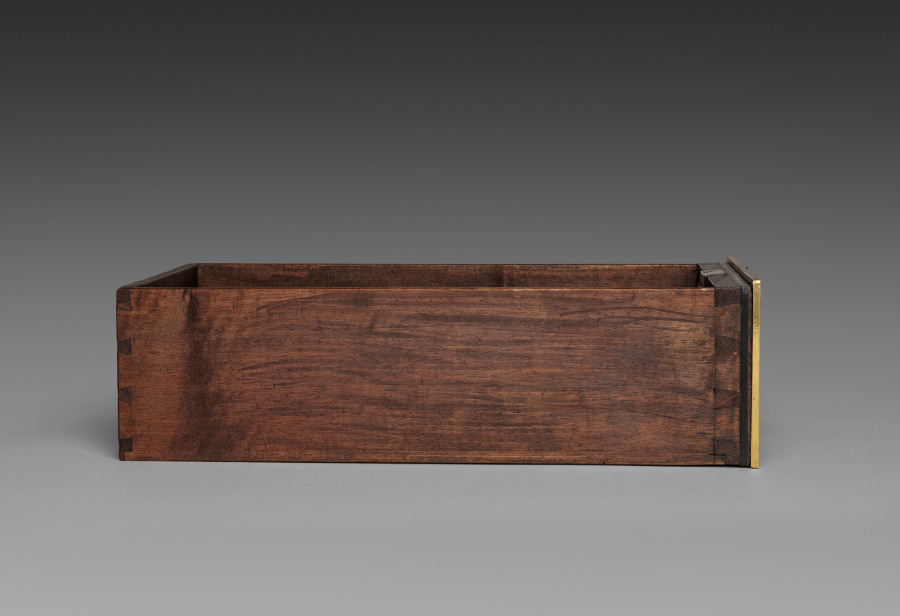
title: Side Drawer for Cabinet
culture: France, late 17th Century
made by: André-Charles Boulle (French, 1642–1732)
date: c. 1690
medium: ebony, marquetry in metal and tortoise shell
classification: Furniture and woodwork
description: Appointed cabinetmaker to King Louis XIV in 1672, André-Charles Boulle became a master of furniture making in France during the late 1600s until his death in 1732. Known primarily for his use of marquetry, in which metal patterns are inlaid into tortoiseshell then applied within the veneered surface of the furniture, Boulle established a level of quality and craftsmanship few others could achieve. As a result, his work found favor at the royal court and among other aristocrats and diplomats eager to impress the king. The inclusion of a medallion depicting Louis XIV within the bronze decoration of this chest would have identified the owner with the royal court. Often exhibiting stout architectural proportions with elegant groups of inlaid motifs such as the parrot on the central panel of this chest, Boulle’s designs are an example of the intellectual fashion for contrasting ideas, materials, and motifs.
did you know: Originally designed to sit atop an elaborate tall stand, this chest was likely altered in the late 1700s to reduce its scale and height.